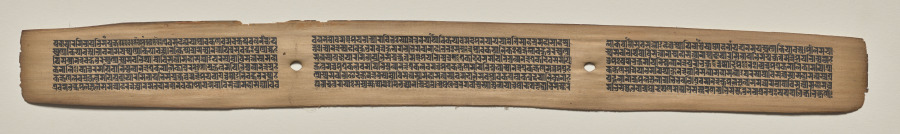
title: Text, folio 164 (recto), from a Manuscript of the Perfection of Wisdom in Eight Thousand Lines (Ashtasahasrika Prajnaparamita-sutra)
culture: Eastern India, Bihar, Vikramashila Monastery. Painting: Nepal, Kathmandu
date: Sunday, September 14, 1119 (year 239 of the Newar Samvat in the month of Ashvina)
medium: gum tempera and ink on palm leaves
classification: Painting